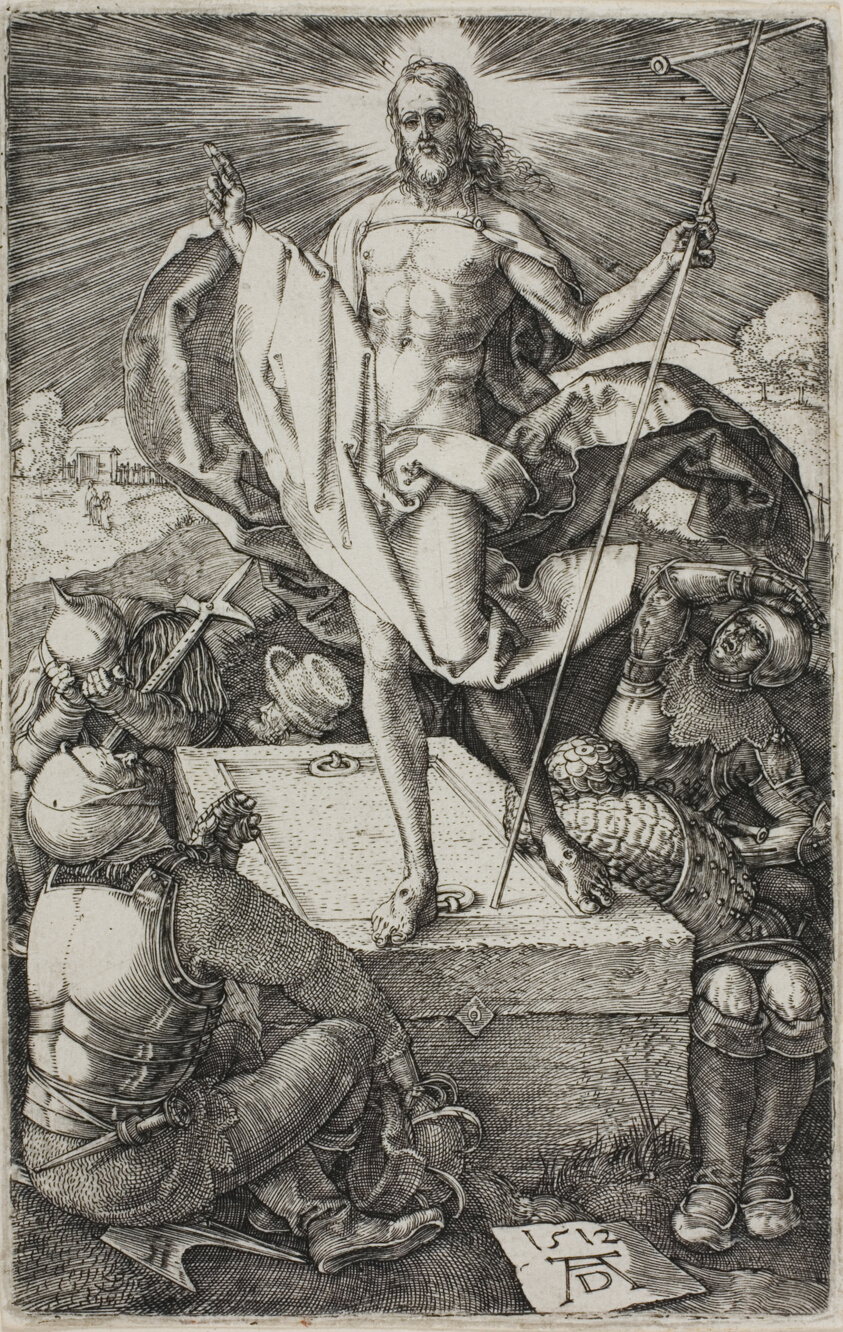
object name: Print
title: Resurrection, from The Engraved Passion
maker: Albrecht Dürer (German, 1471-1528)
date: 1512, published 1513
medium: Engraving in black on ivory laid paper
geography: Germany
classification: engraving; print; prints and drawing; paper